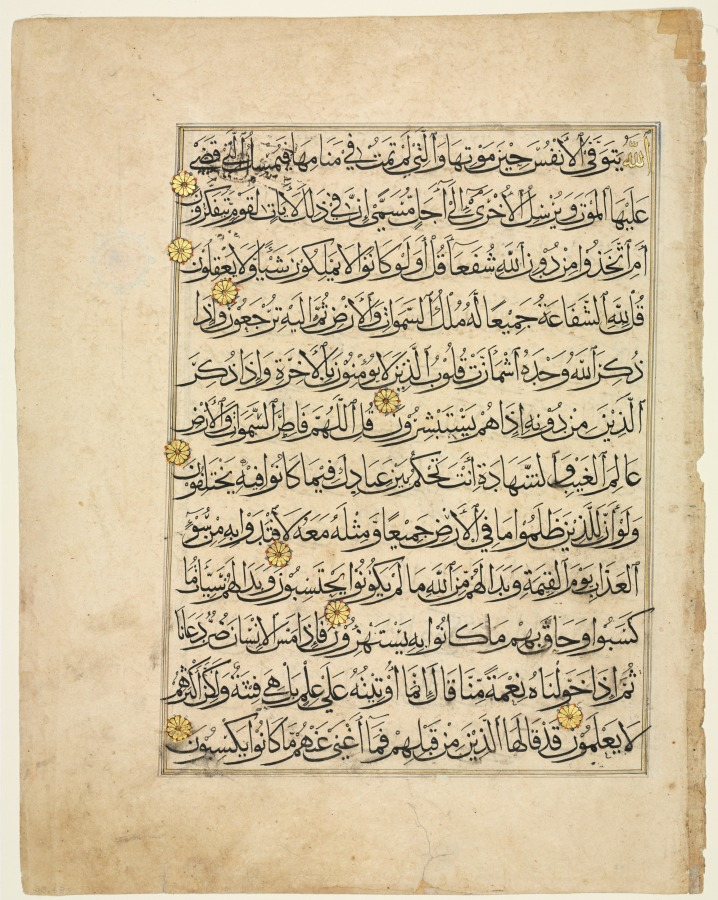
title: Qur'an Manuscript Folio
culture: Egypt, Mamluk sultanate (1250–1517)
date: 1300s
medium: ink, gold, and colors on paper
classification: Drawing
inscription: Surah al-Zumar [Chapter: The Crowds] 39: 42–50 on recto and 51–60 on verso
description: The text includes verses from the 39th chapter of the Qur’an, "Surah al-Zumar." The Arabic text is written in Rayhani script, one of the six official scripts of Perso-Arabic calligraphy, and ornamented with red, blue, and gold rosettes. There is a red, blue, and gold roundel in the border on the verso (front).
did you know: The text is from Chapter 39 of the Qur'an, "Surah al-Zumar"; verses 42–50 are on recto, while 51–60 are on the verso.